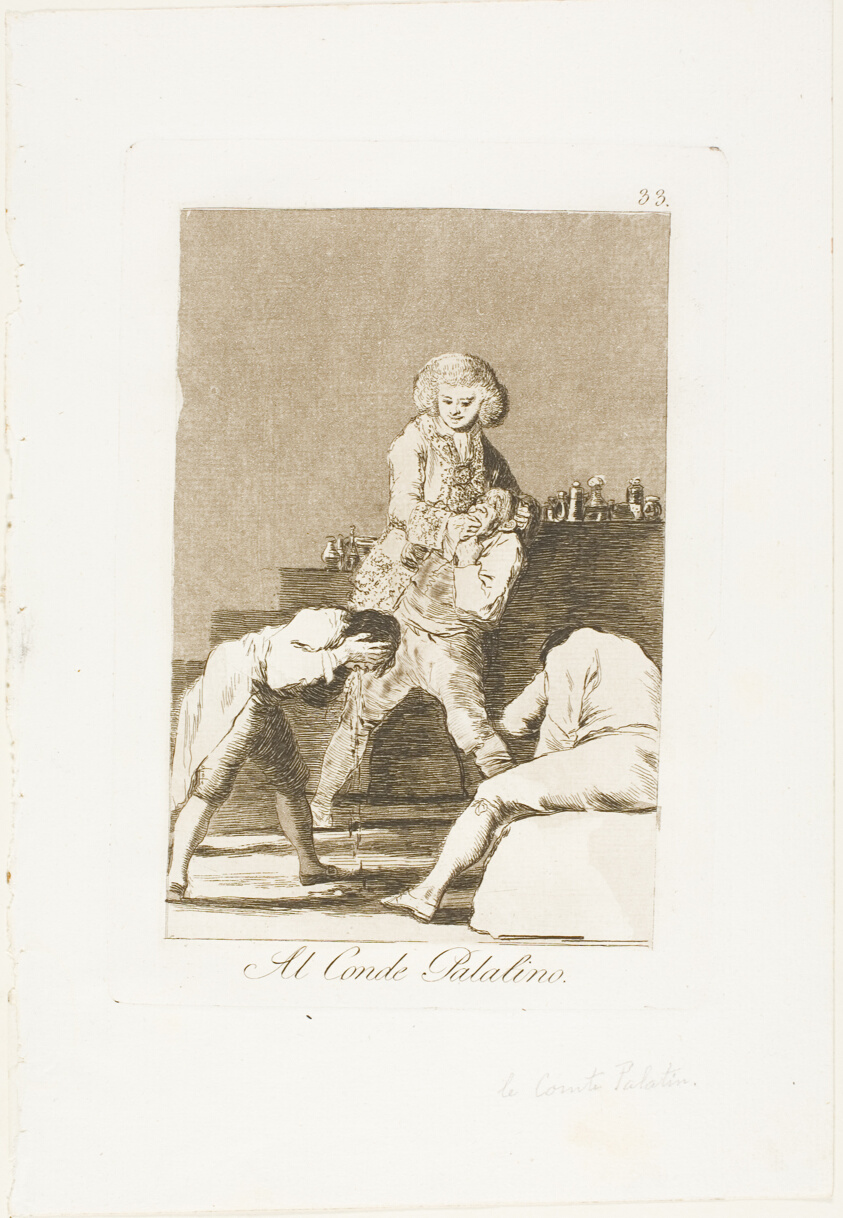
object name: Print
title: To the Count Palatine or Count of the Palate, plate 33 from Los Caprichos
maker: Francisco José de Goya y Lucientes (Spanish, 1746-1828)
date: 1797/99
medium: Etching and aquatint on ivory laid paper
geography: Spain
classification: etching; print; prints and drawing